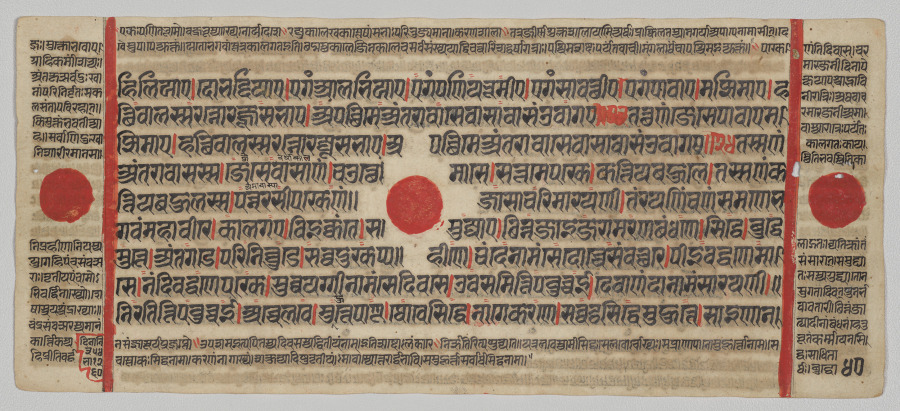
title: Text, Folio 40 (verso), from a Kalpa-sutra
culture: Western India, Gujarat, last quarter of the 15th century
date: c. 1475–1500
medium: Gum tempera, ink, and gold on paper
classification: Painting